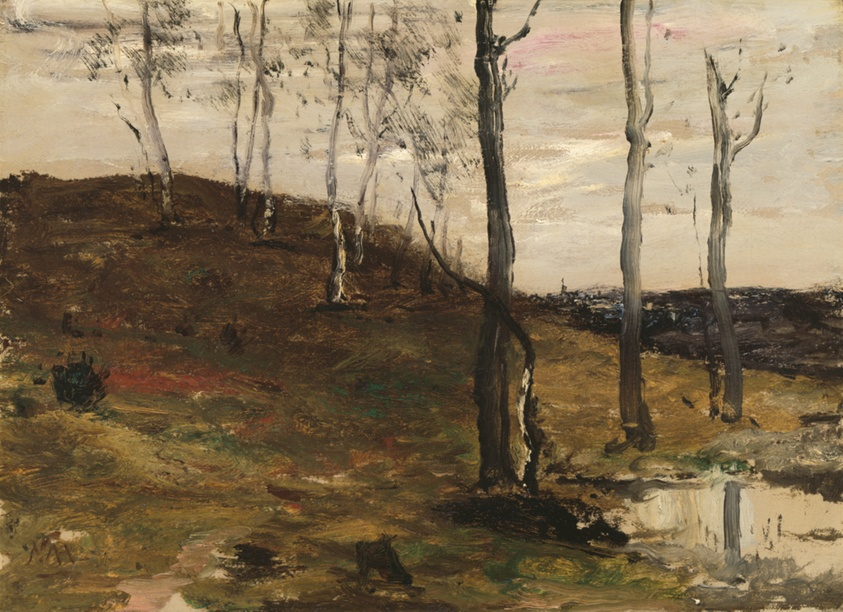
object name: Painting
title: Hillside with Trees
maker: William Morris Hunt (American, 1824–1879)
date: 1872–78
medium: Oil on canvas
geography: Boston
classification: painting; american arts